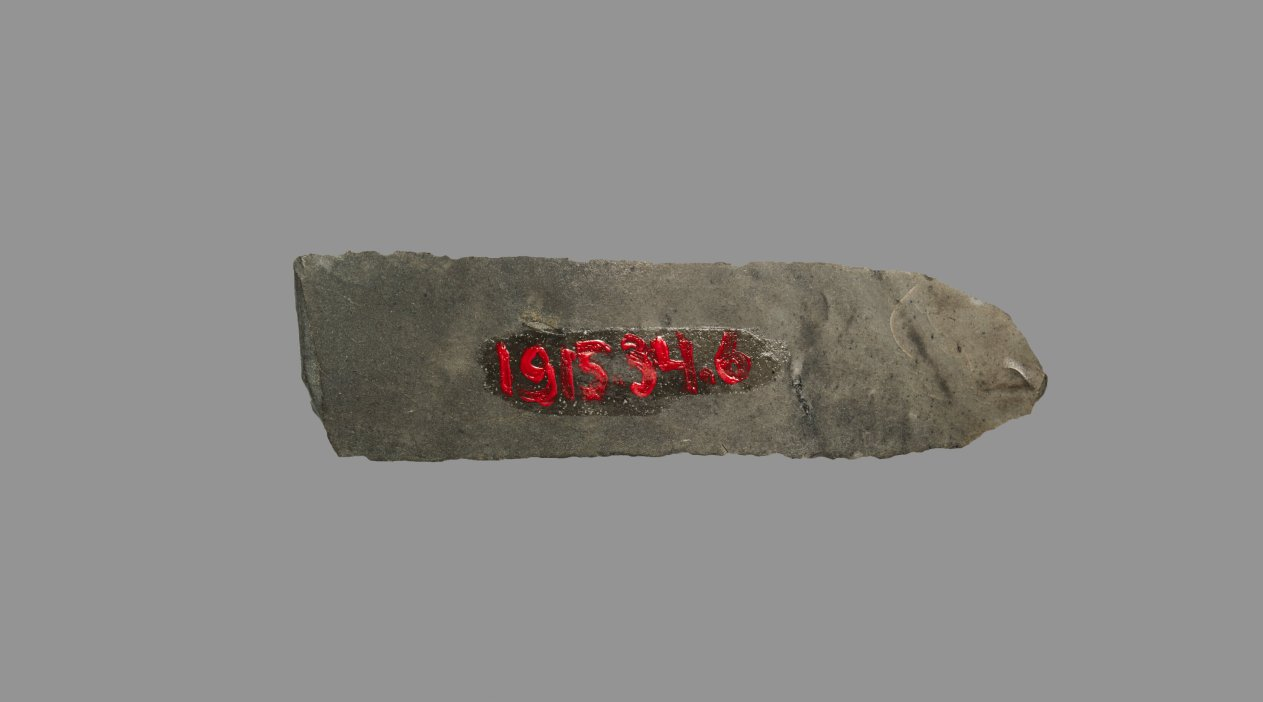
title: Sickle Blade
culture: Egypt, Middle Kingdom (2040–1648 BCE), Dynasty 12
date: 1980–1801 BCE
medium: flint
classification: Implements